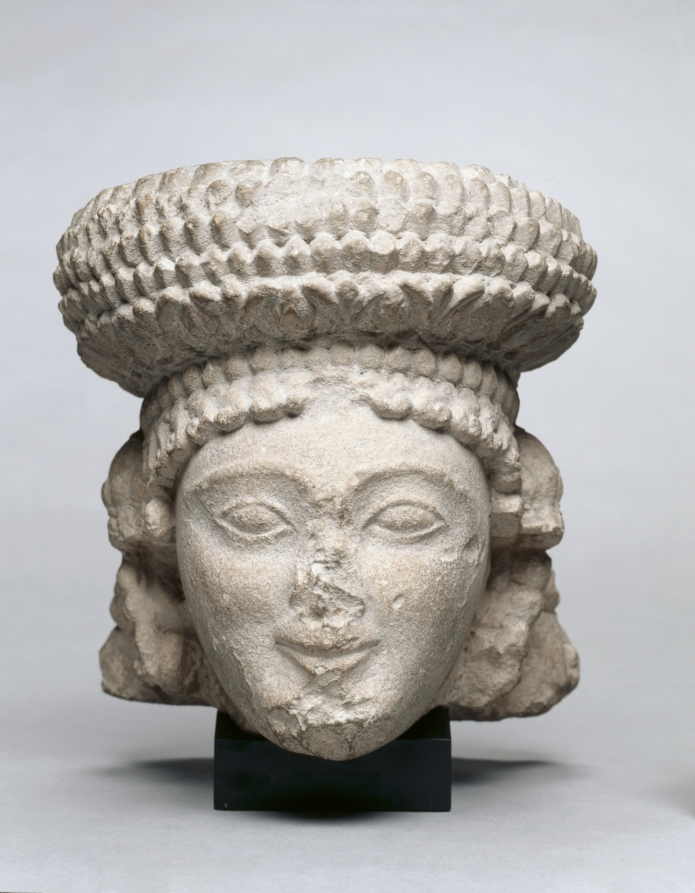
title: Head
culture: Cyprus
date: 500–300 BCE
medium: limestone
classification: Sculpture